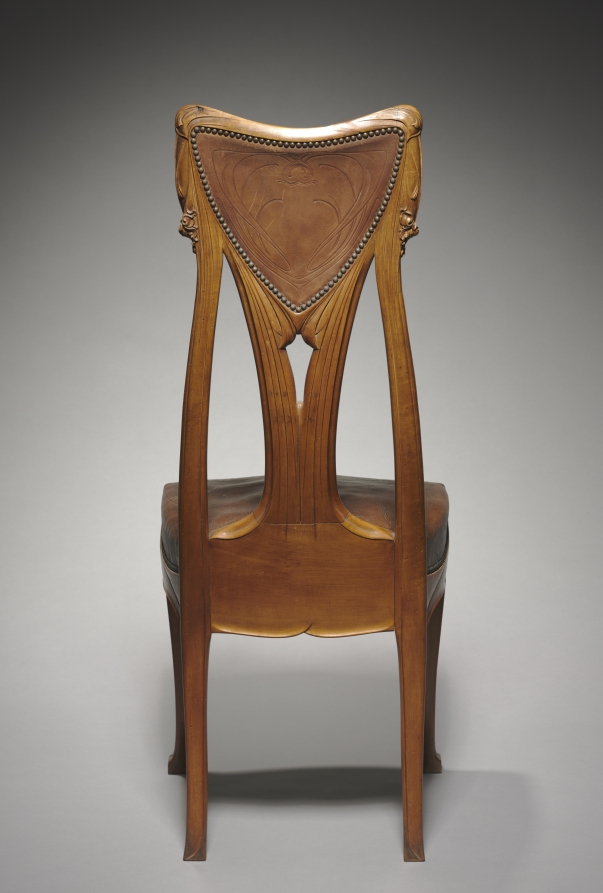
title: Chair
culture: France, 20th century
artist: Hector Guimard (French, 1867–1942)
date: c. 1907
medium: pearwood with tooled leather back and seat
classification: Furniture and woodwork